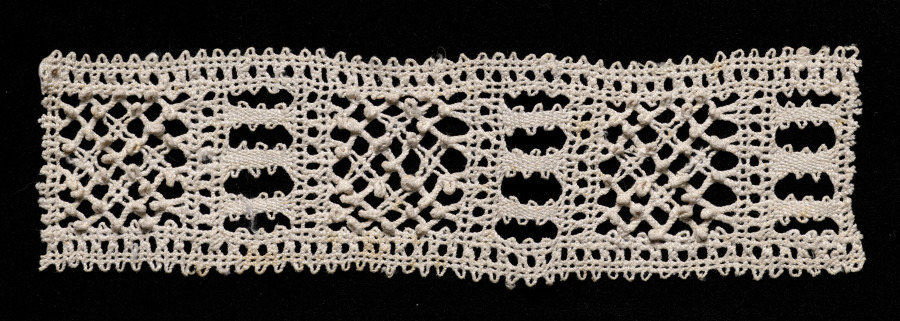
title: Lace Insertion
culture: Italy, Venice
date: 1540–60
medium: Bobbin lace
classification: Lace